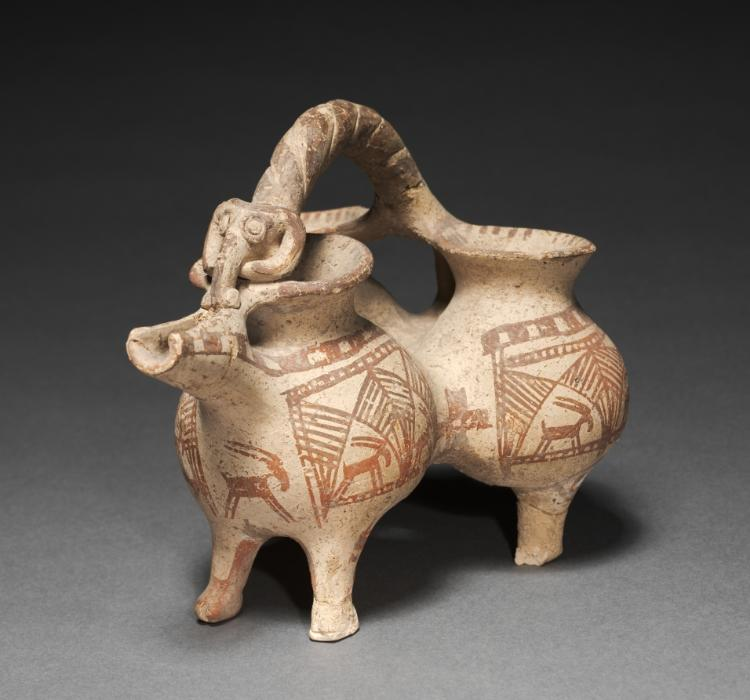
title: Three-Part Pitcher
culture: Iran, Luristan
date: c. 800–700 BCE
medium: earthenware, unglazed slip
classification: Ceramic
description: This unusual tripartite pitcher is made of three jugs joined together, a twisted handle, and a ram’s head atop a spout. Four feet connect to the pitchers, adding stability and an animal-like form. Ibexes, diamonds, and crosses, all painted in red slip, decorate the clay surface. This work is likely Baba Jan III ware from the Iron Age site Baba Jan in northwestern Iran. The pitcher is functional but may have served a ritual purpose.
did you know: The ram’s head was created separately before being attached to the spout.